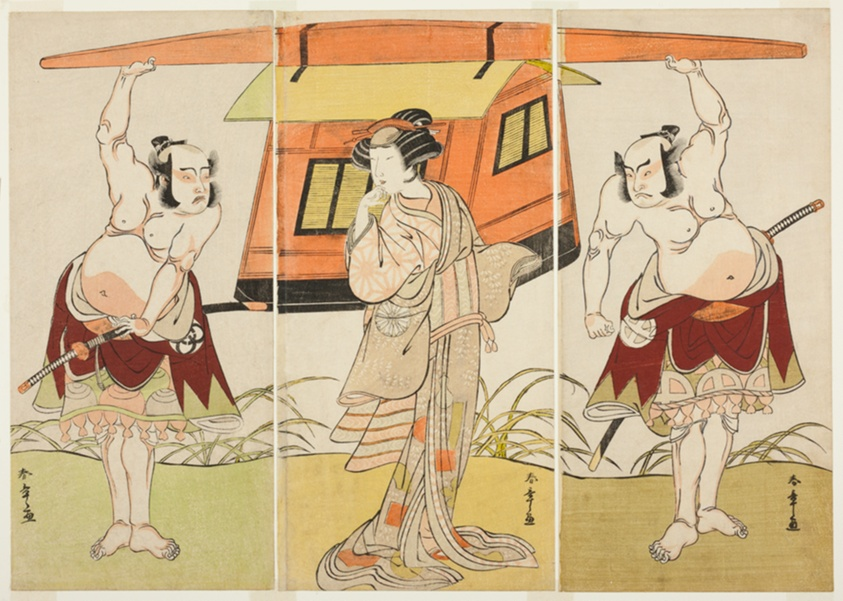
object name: Print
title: The Actors Otani Hiroji III as Yokambei (right), Nakamura Tomijuro I as Kuzunoha (center), and Bando Mitsugoro I as Yakambei (left), in the Last Scene from the Play Shinodazuma (The Wife from Shinoda Forest), Performed as a Supplement to the Play Kikyo-zome Onna Urakata (Female Diviner in Deep Violet), at the Morita Theater from the Ninth Day of the Ninth Month, 1776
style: Japanese (culture or style)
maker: Katsukawa Shunsho 勝川 春章; Japanese, 1726-1792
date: c. 1776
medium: Color woodblock print; hosoban; triptych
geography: Japan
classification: woodblock print; print; asian art